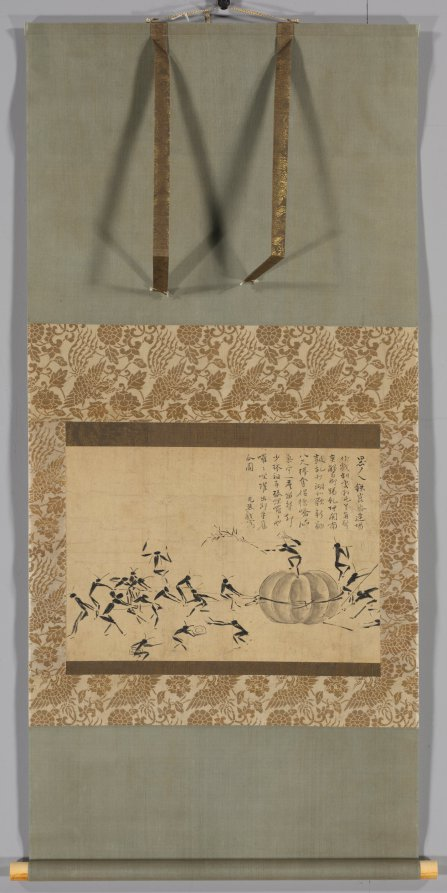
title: Festival of Insects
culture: Japan, Edo period (1615–1868)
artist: after Motsurin Jōtō (Japanese, d. 1492)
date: c. 1615–1868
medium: Hanging scroll; ink on paper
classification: Painting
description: This painting depicts humanlike figures with antennae engaged in a festival procession. They transport a gourd like a float, with two teams pulling ropes in front, and others maneuvering it with poles from behind. They are accompanied by flutes and drums, urged on by a dancer holding a fan and a branch. The inscription is attributed to the monk-painter Motsurin Jōtō (Bokusai), well known in Japan as a disciple of Ikkyū Sōjun and an accomplished portrait artist.